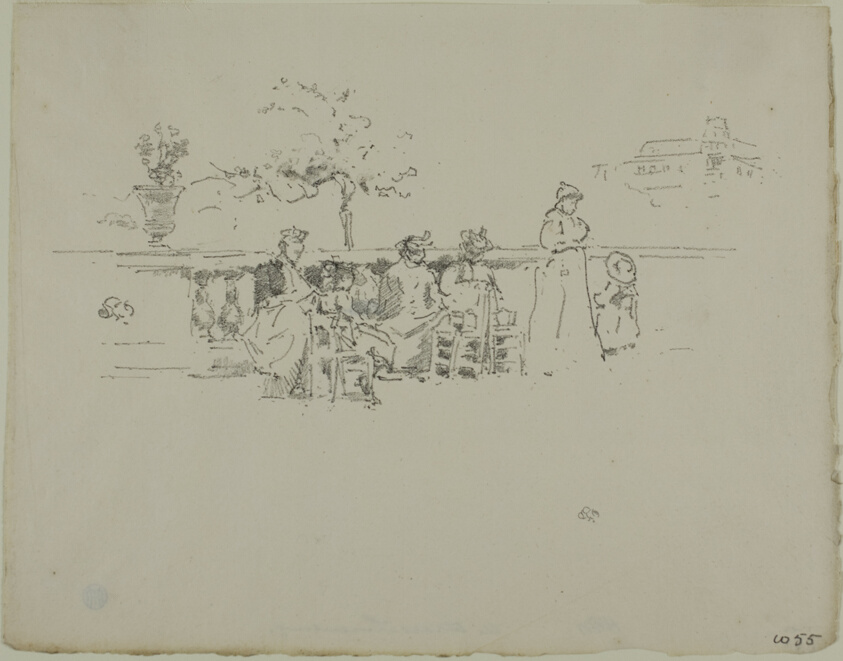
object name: Print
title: The Terrace, Luxembourg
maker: James McNeill Whistler (American, 1834-1903)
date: 1894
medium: Transfer lithograph in black with stumping, on ivory laid paper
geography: United States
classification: transfer lithograph; lithograph; print; prints and drawing; paper